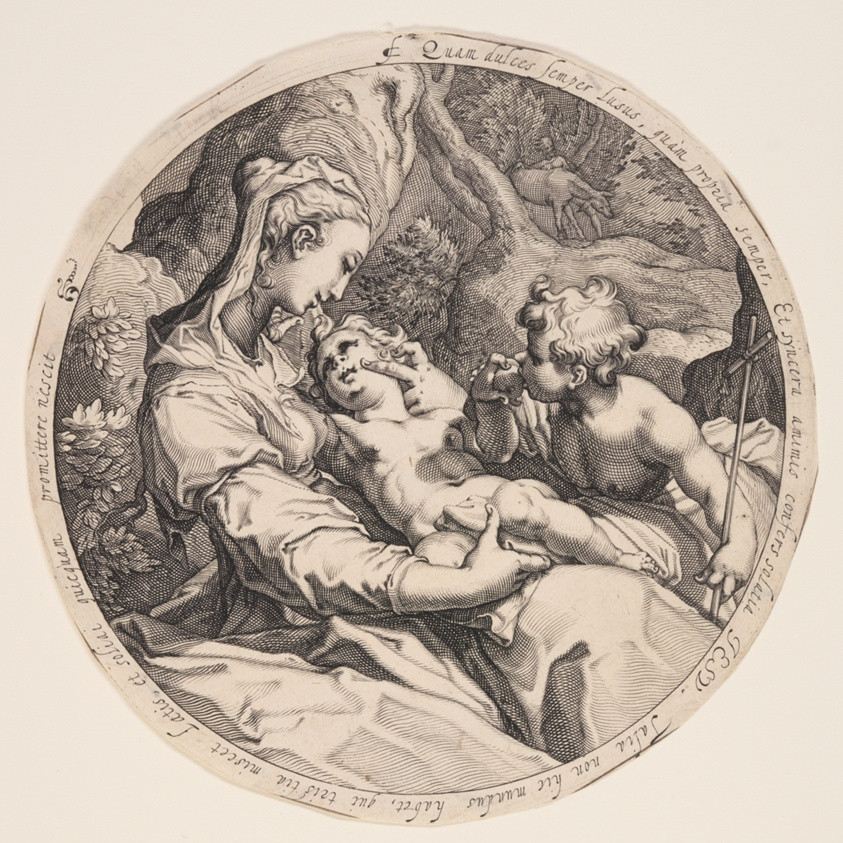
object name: Print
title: Virgin and Child with St. John the Baptist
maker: Jacques de Gheyn II (Dutch, 1565–1629) or workshop; after Abraham Bloemaert (Dutch, 1566–1651)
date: c. 1595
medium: Engraving on laid paper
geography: Netherlands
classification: engraving; paper; print; prints and drawing